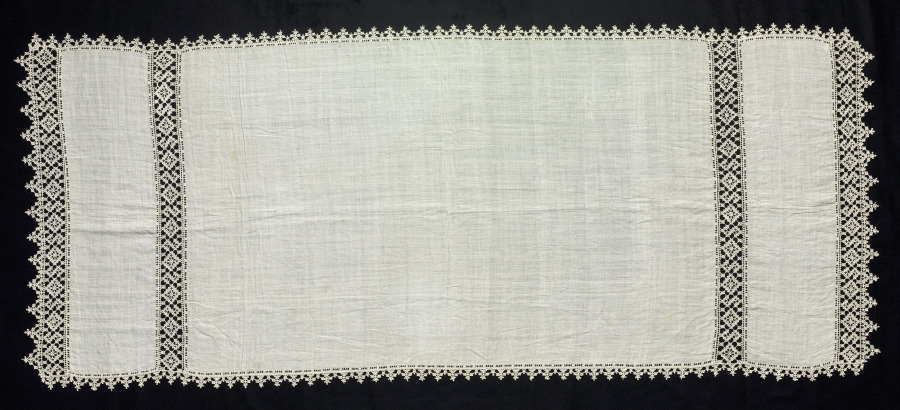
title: Lace Cloth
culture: Italy, Venice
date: 1540–60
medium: Bobbin lace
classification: Lace